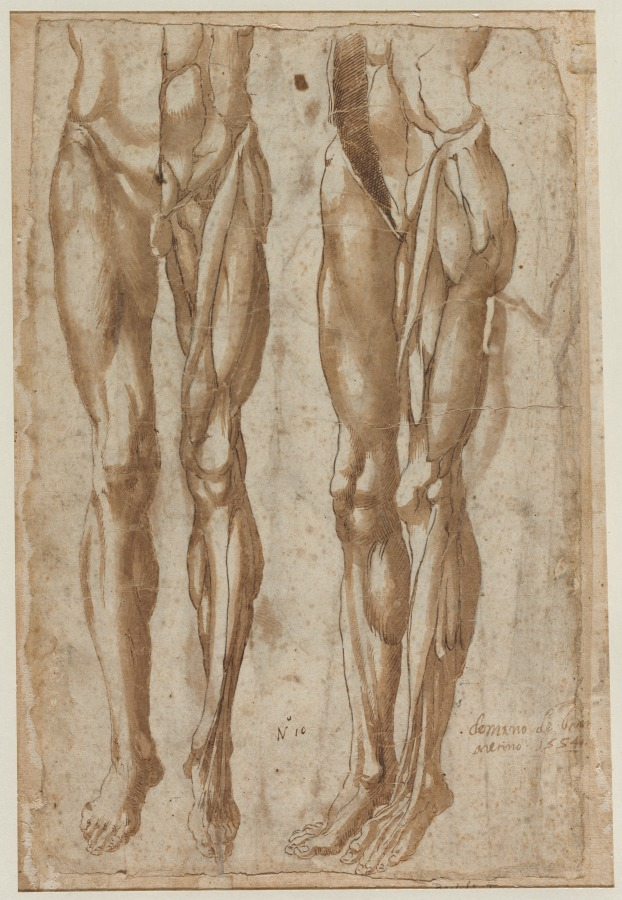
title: Two Studies of a Flayed Man (recto) Study of a Flayed Torso (verso)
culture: Italy, 16th century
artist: Bartolommeo da Arezzo (Italian, active about 1550–80)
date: 1554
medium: pen and brown ink and brush and brown wash over black chalk; incised (both figures) and pricked (left figure)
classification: Drawing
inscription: signed, lower right, in brown ink: demano de bart / aretino . 1554 . [underlined] ; by artist(?), lower center, in brown ink: N° 10 ; lower right, in graphite [Bartolo° T?] [partially masked]